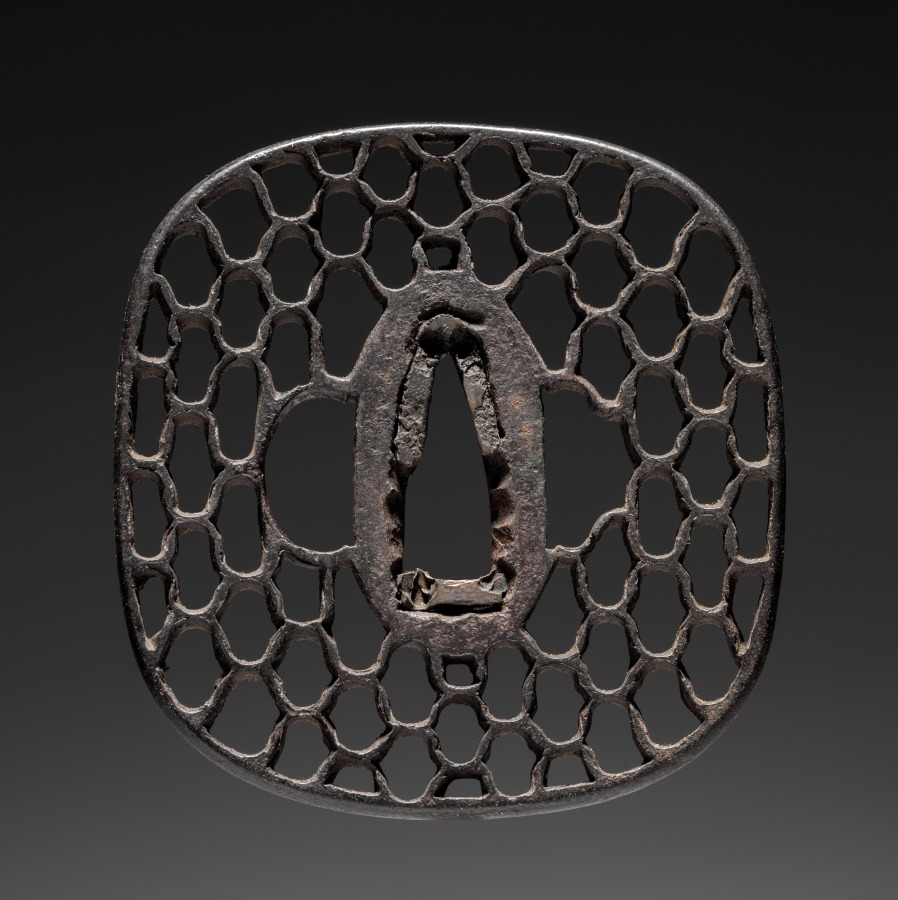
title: Sword Guard (Tsuba)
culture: Japan, possibly Edo period (1615-1868)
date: c. 1615–1868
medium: iron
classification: Arms and Armor